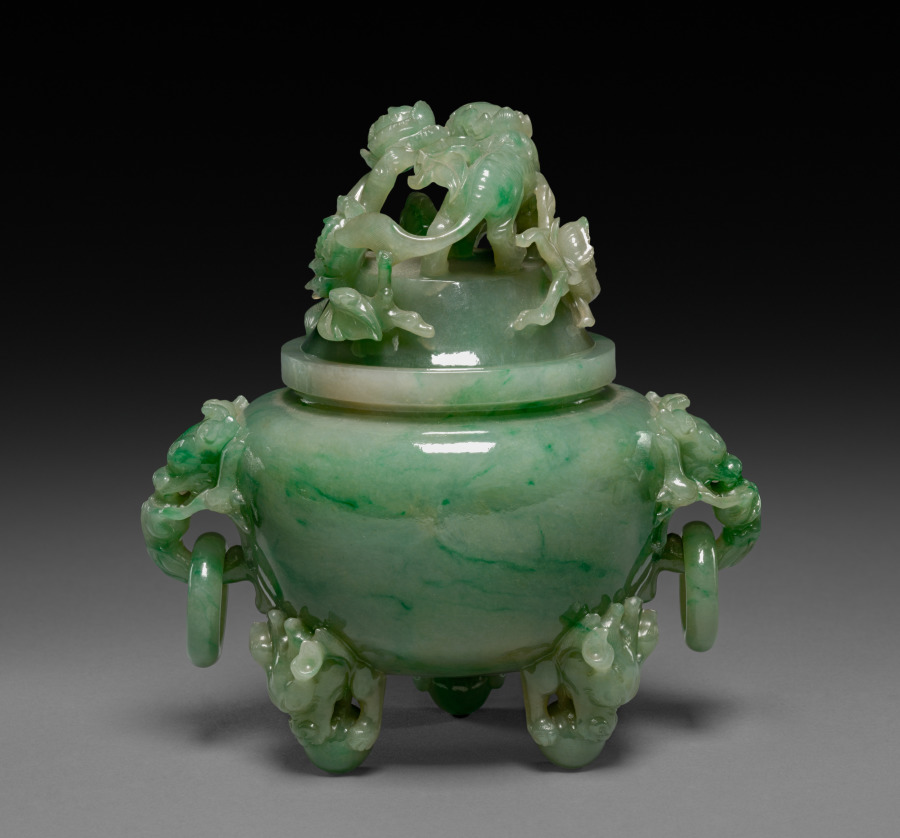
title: Tripod Vase: Ting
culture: China, Qing dynasty (1644-1911)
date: 1644–1911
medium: jade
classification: Jade